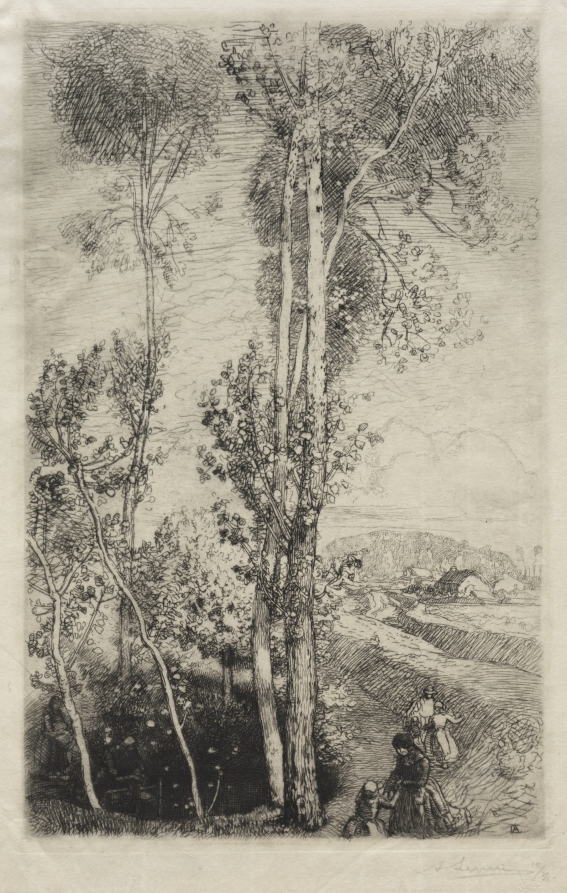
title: La Petite Mare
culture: France, 20th century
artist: Auguste Louis Lepère (French, 1849–1918)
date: 1908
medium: etching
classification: Print